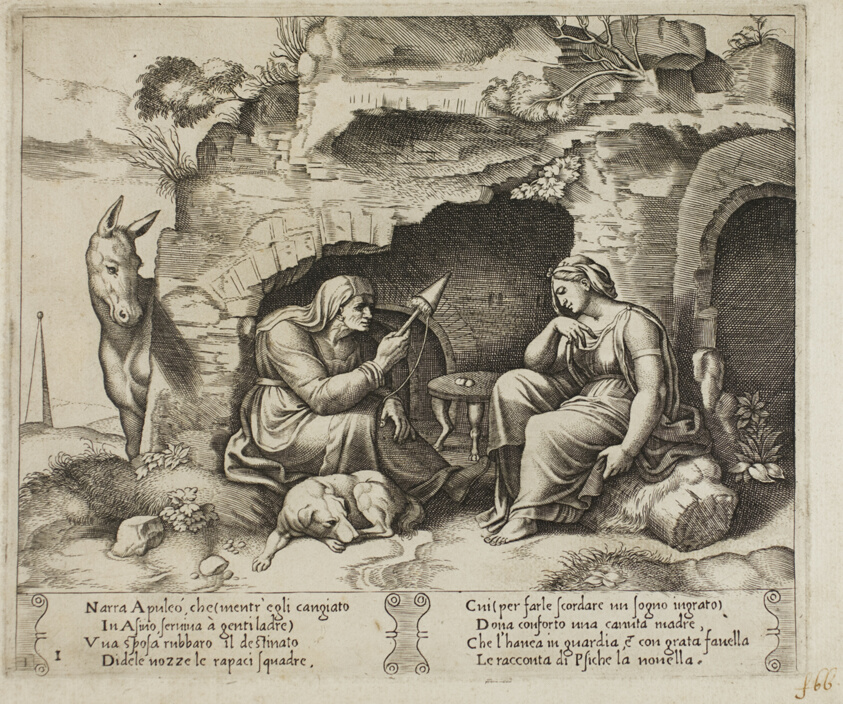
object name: Print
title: Apuleius Changed into a Donkey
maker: Master of the Die (Italian, active c. 1530-1560); after Michiel Coxcie I (Flemish, 1499-1592); in turn, inspired by Raffaello Sanzio, called Raphael (Italian, 1483-1520)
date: 1530/40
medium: Engraving in warm brown ink on cream laid paper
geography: Italy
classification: engraving; print; prints and drawing